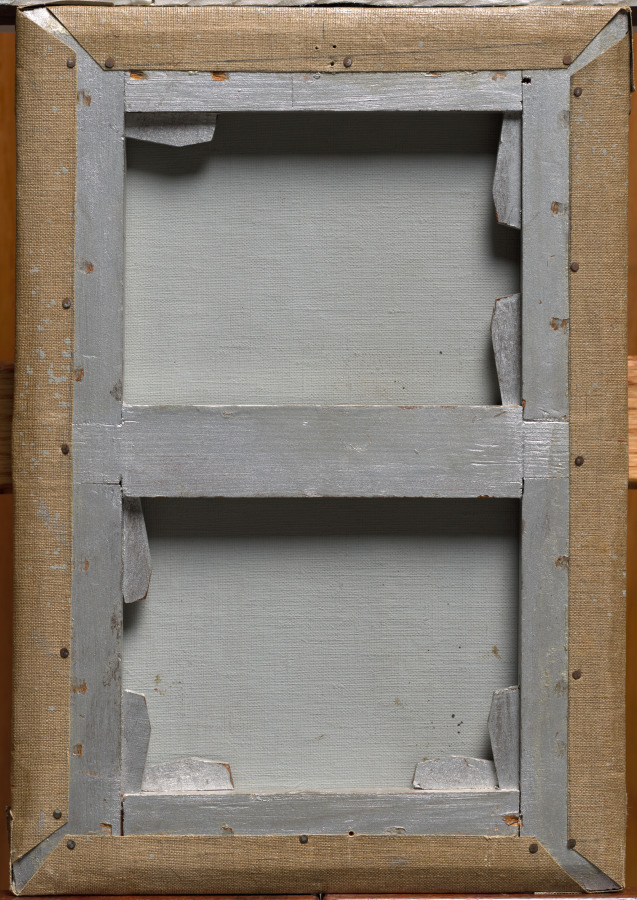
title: St. Matthew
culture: England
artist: William Blake (British, 1757–1827)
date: 1799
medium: tempera on canvas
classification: Painting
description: The energy and awe with which the evangelist Saint Matthew responds to the angel presenting the divinely inspired text echoes William Blake’s attitude toward artistic inspiration. From childhood Blake experienced visions that are reflected in the otherworldliness of his work. While Blake was not embraced by the fine art establishment, a small group of patrons believed in his genius and commissioned works in which his unusual visions had free rein.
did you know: Like St. Matthew, William Blake reported having visions of angels throughout his life.